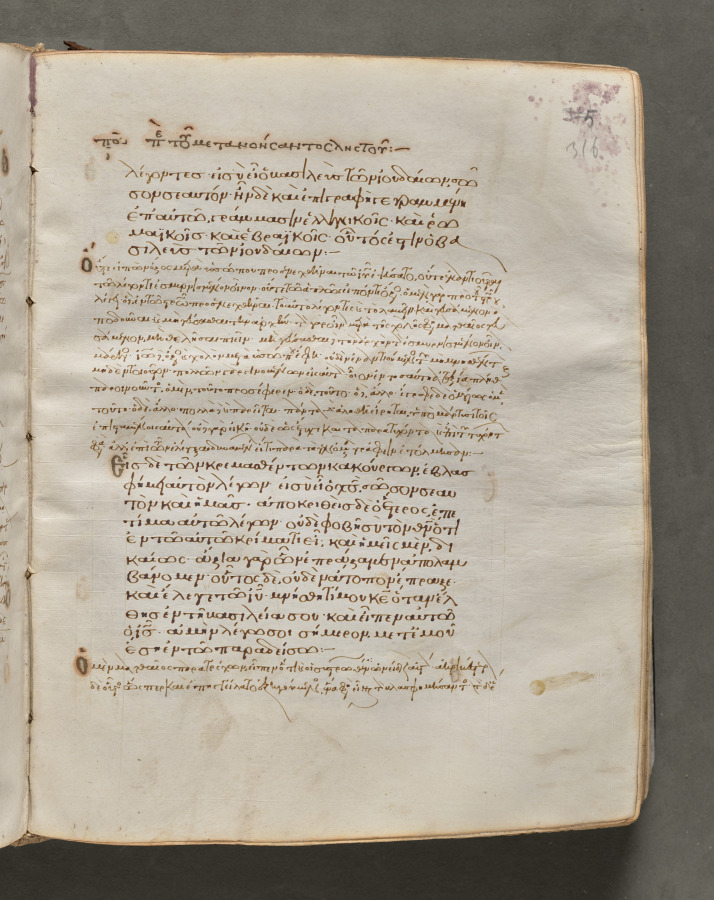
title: Text, folio 316 (recto), from a Gospel Book with Commentaries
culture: Byzantium, Constantinople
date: c. 1000–1100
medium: ink, tempera, and gold on vellum; leather binding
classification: Bound Volume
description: Each of the four gospels in this book opens on a page with brilliantly illuminated borders depicting the author of the text as well as birds—principally peacocks, symbols of the immortality of the soul—and fountains, representing the fountain of life and the salvation of the soul. This volume consists of 428 leaves with texts in Greek. Its level of sophistication suggests that it was probably written and decorated in a monastery in Constantinople.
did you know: Gospel books were carried in procession through Byzantine churches.